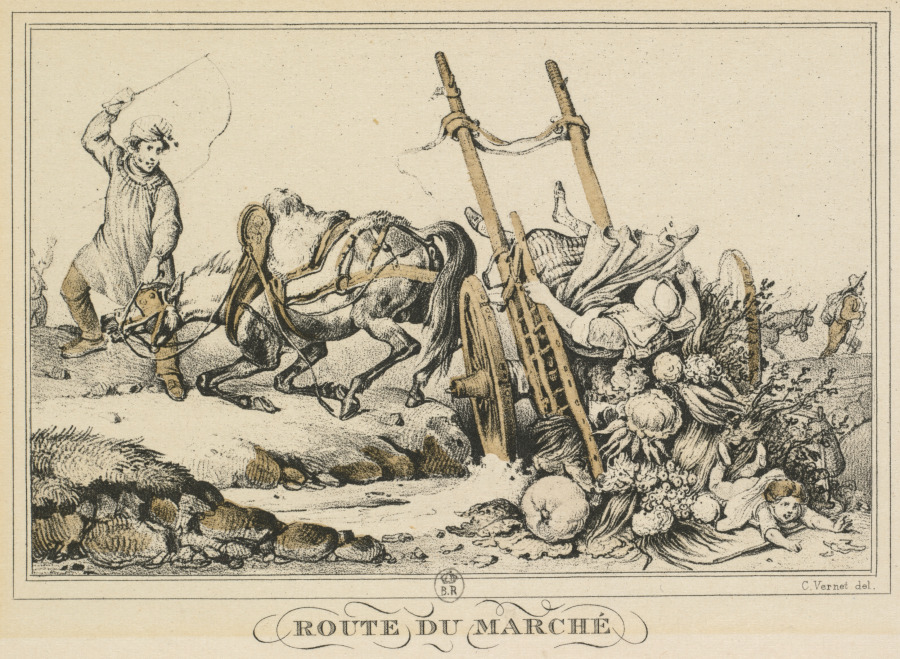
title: Scenes of Daily Life, Roads and Paths: Road to Market (Scènes de la vie quotidienne, Routes et Chemins: Route du Marché)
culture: France, 19th century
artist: Carle Vernet (French, 1758–1836)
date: 1819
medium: lithograph gravure en couleurs a l'aquantinte par Debucourt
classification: Print